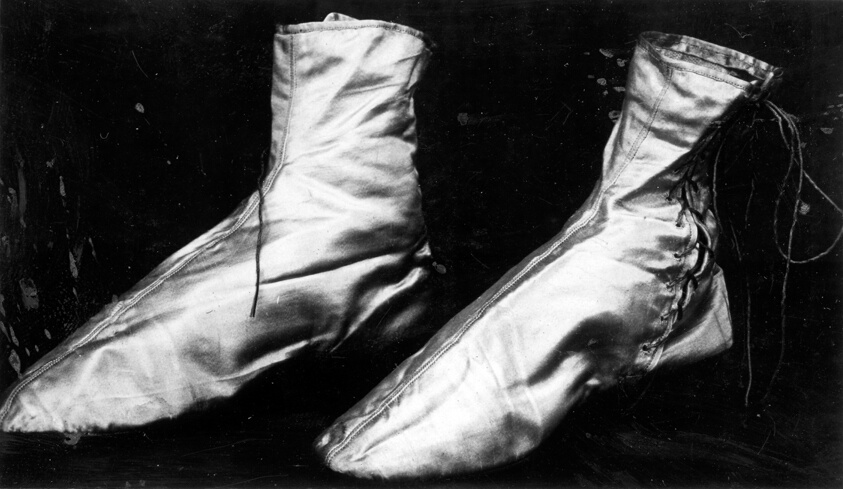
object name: Textile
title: Pair of Startups (Half Boots)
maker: United States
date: c.1860s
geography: United States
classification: textile; shoes - lace; costume accessory - shoe; costume; dress (garment); clothing